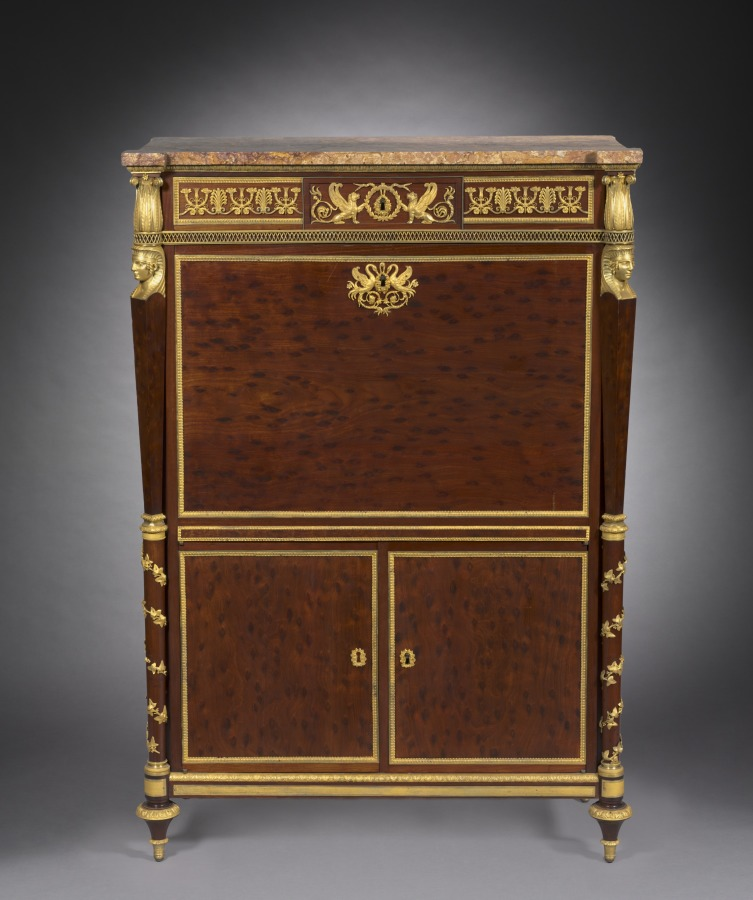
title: Secretary (Secrétaire)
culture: France, 18th century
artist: attributed to Bernard Molitor (French, 1755–1833)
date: c. 1800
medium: mahogany on oak carcass, ormolu mounts, marble top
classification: Furniture and woodwork